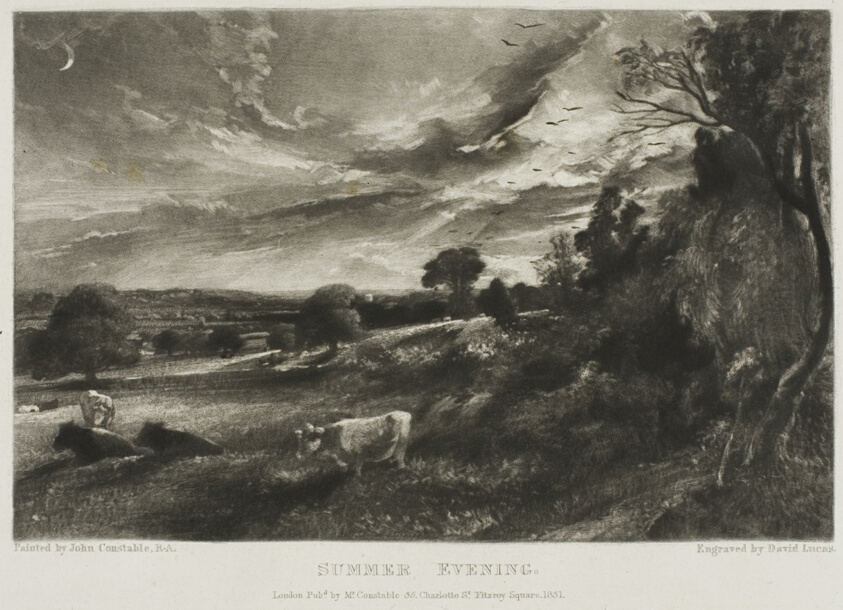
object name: Print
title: Summer Evening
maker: David Lucas (English, 1802-1881); after John Constable (English, 1776-1837)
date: 1831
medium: Mezzotint on paper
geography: England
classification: mezzotint; print; prints and drawing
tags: landscapes